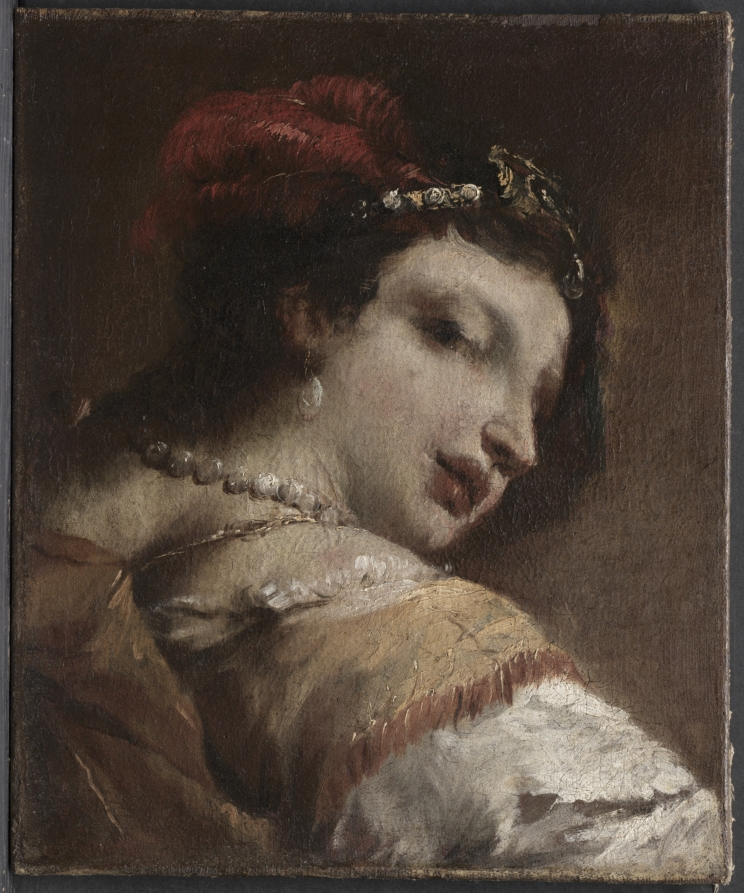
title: Head of a Woman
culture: Italy, 18th century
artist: Antonio Guardi (Italian, 1699–1760)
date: c. 1739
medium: oil on canvas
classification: Painting